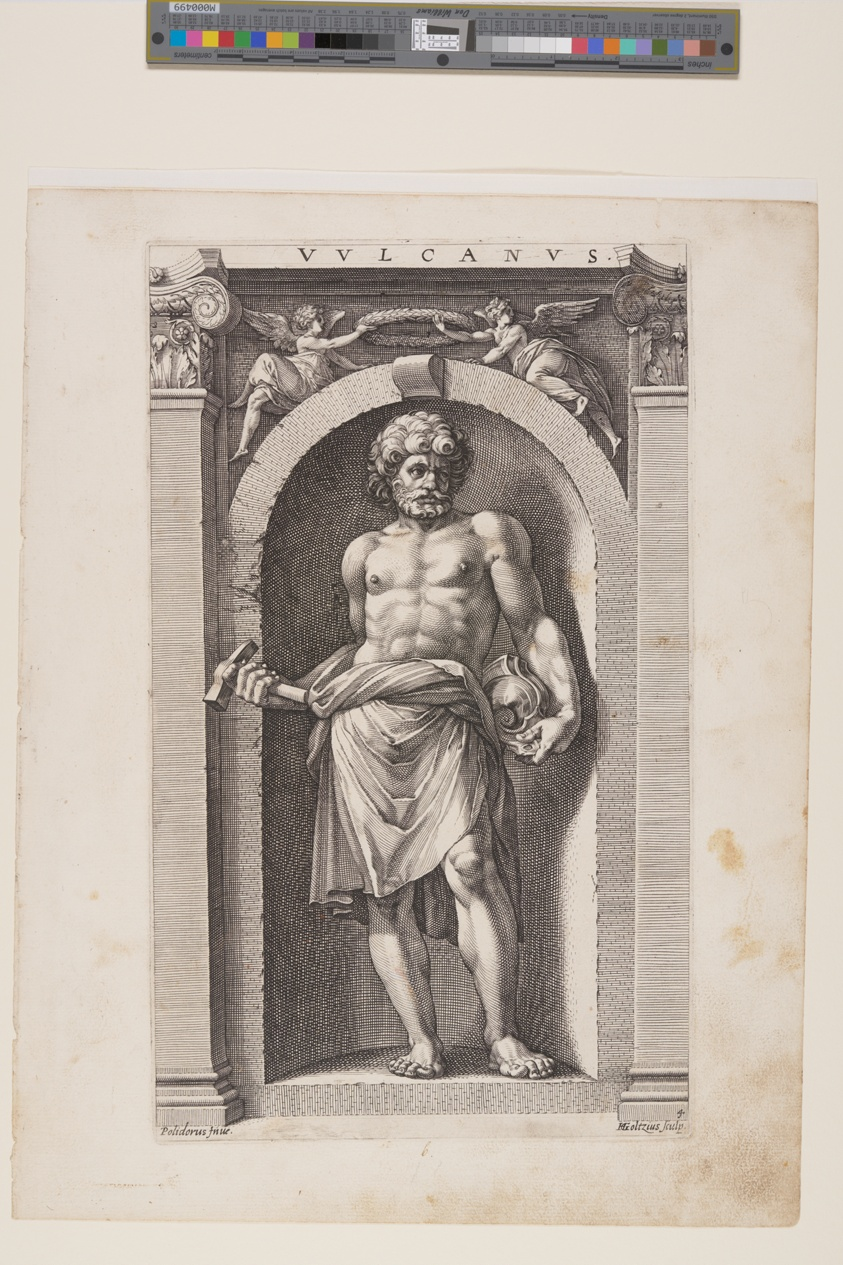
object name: Print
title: Vulcanus, from Eight Pagan Gods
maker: Hendrick Goltzius (Dutch, 1558–1617); after Polidoro da Caravaggio (Italian, c. 1499–c. 1543)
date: 1592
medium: Engraving on ivory laid paper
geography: Netherlands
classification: print; paper; prints and drawing; engraving